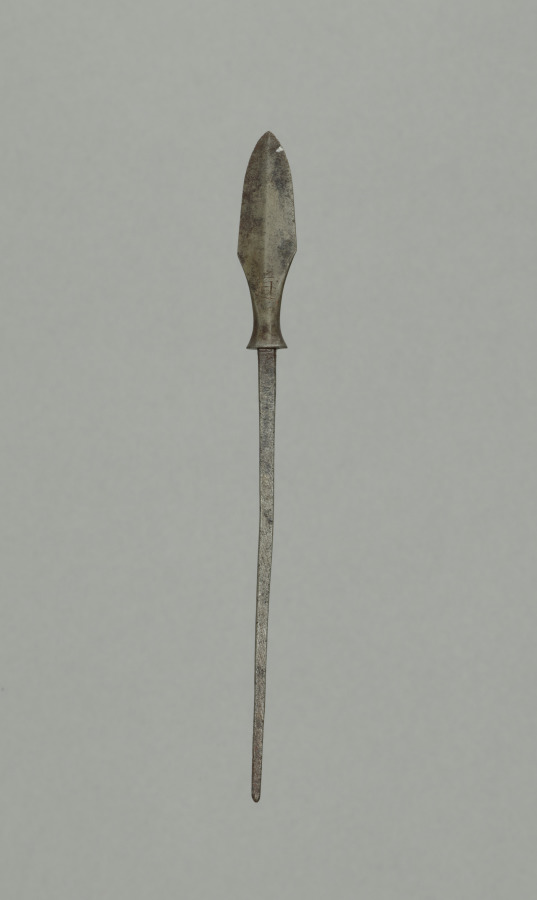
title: Arrow Point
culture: Japan, Edo period (1615–1868)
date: 1700s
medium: steel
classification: Arms and Armor